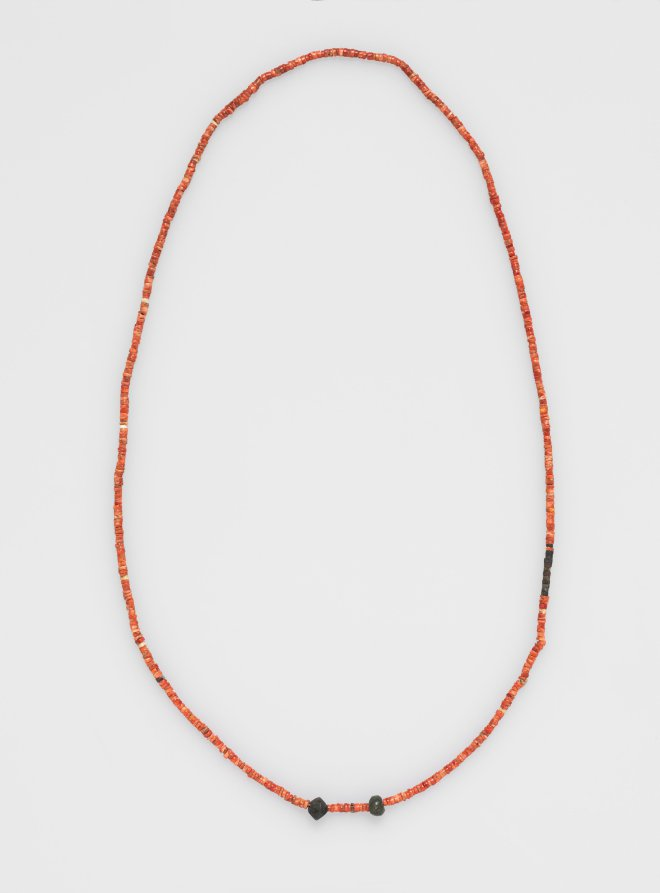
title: Necklace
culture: Peru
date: before 1532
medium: coral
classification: Jewelry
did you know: These ancient beads were restrung in modern times.